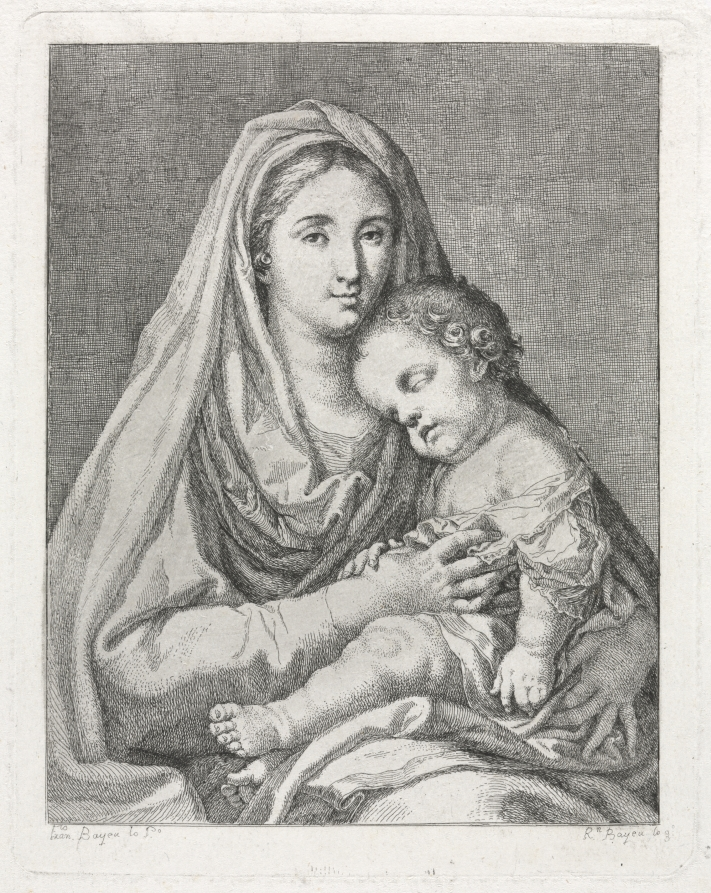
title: Madonna and Child (after Francisco Bayeu y Subias)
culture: Spain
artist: Ramón Bayeu y Subias (Spanish, 1746–1793)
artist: after Francisco Bayeu Y Subias (Spanish, 1734–1795)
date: late 1700s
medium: etching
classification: Print